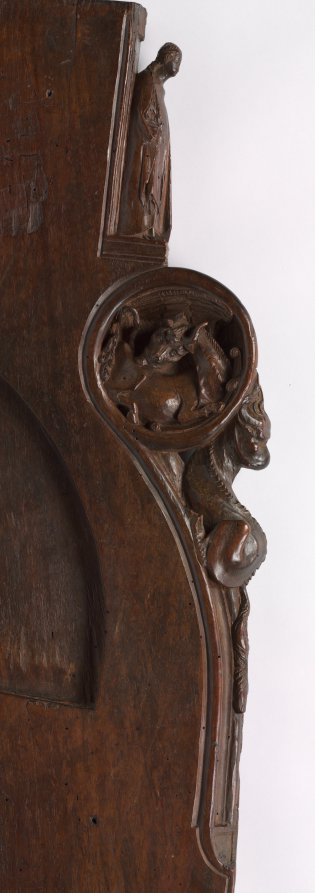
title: Panel from a Choir Stall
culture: Spain, Catalonia, Monastery of Pedralbes, 14th century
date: c. 1330–1340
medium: walnut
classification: Furniture and woodwork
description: The smaller panel here originated from an interior portion of a choir stall. The panel depicts a female figure in a long gown standing on a plinth above two of the apocalyptic beasts, the winged lion of Saint Mark and the winged ox of Saint Luke, which are supported by a wyvern (a heraldic winged dragon).